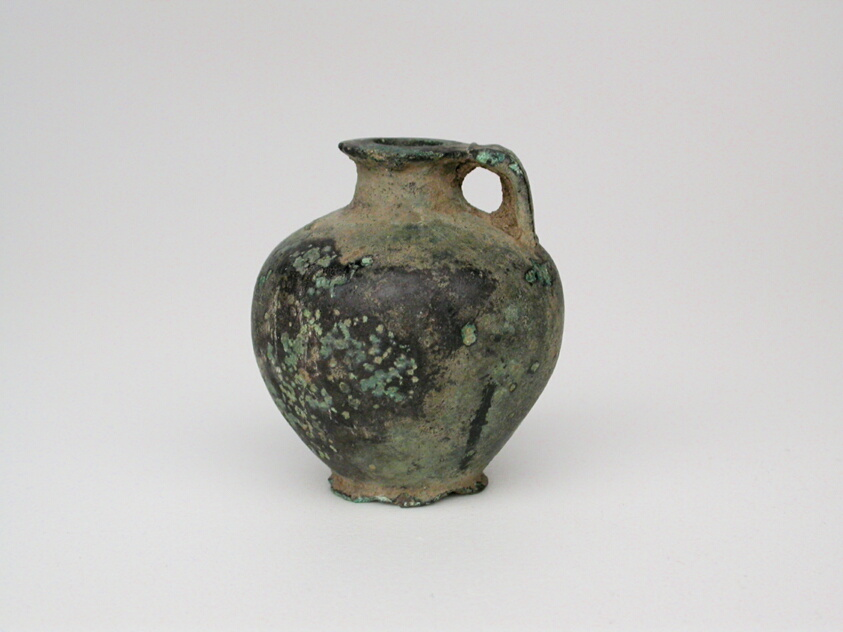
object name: Vessel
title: Oinochoe (Pitcher)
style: geometric, ancient, greek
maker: Greek; Thessaly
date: 800-700 BCE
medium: Bronze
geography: Thessalía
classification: votive offering; ex-voto; vessel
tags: vessels